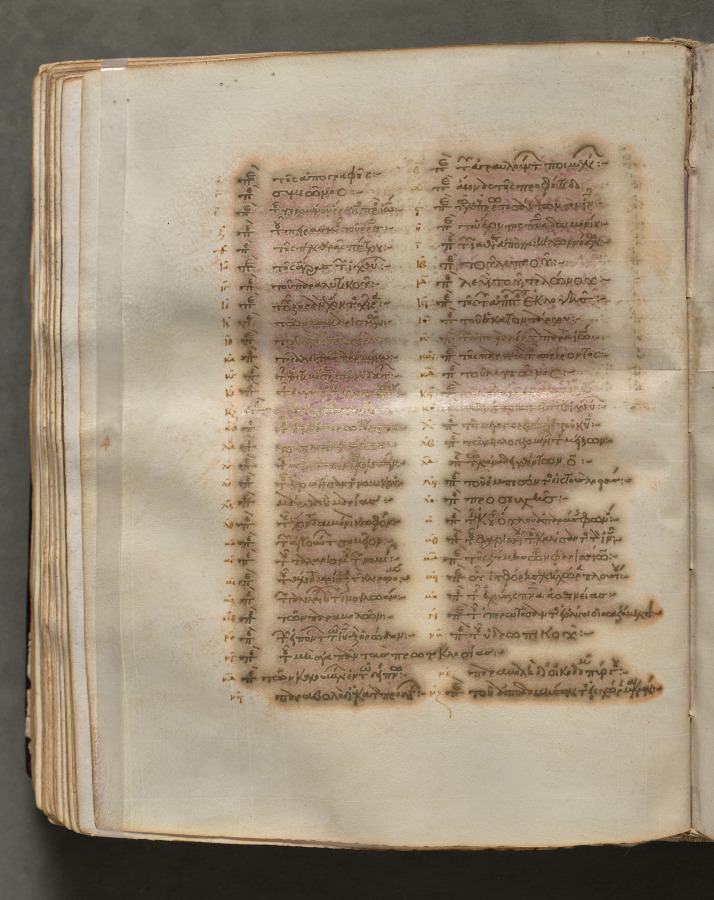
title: Text, folio 198 (verso), from a Gospel Book with Commentaries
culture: Byzantium, Constantinople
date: c. 1000–1100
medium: ink, tempera, and gold on vellum; leather binding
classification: Bound Volume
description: Each of the four gospels in this book opens on a page with brilliantly illuminated borders depicting the author of the text as well as birds-principally peacocks, symbols of the immortality of the soul-and fountains, representing the fountain of life and the salvation of the soul. This volume consists of 428 leaves with texts in Greek. Its level of sophistication suggests that it was probably written and decorated in a monastery in Constantinople.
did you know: Gospel Books were carried in procession through Byzantine churches.